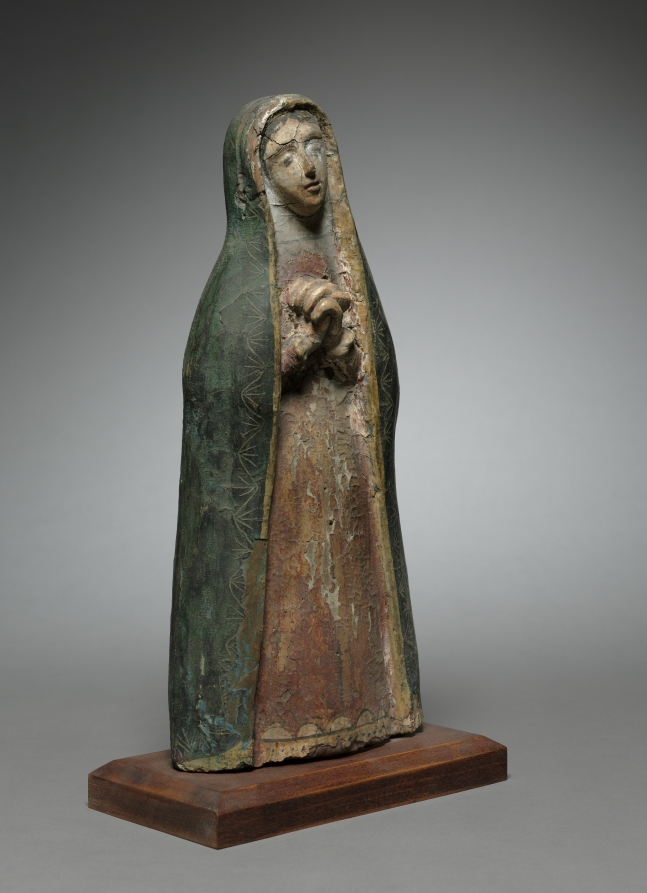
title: Our Lady of Sorrows: santo de bulto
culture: America, New Mexico, 17th-18th century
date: 1600s-1700s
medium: painted wood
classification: Sculpture